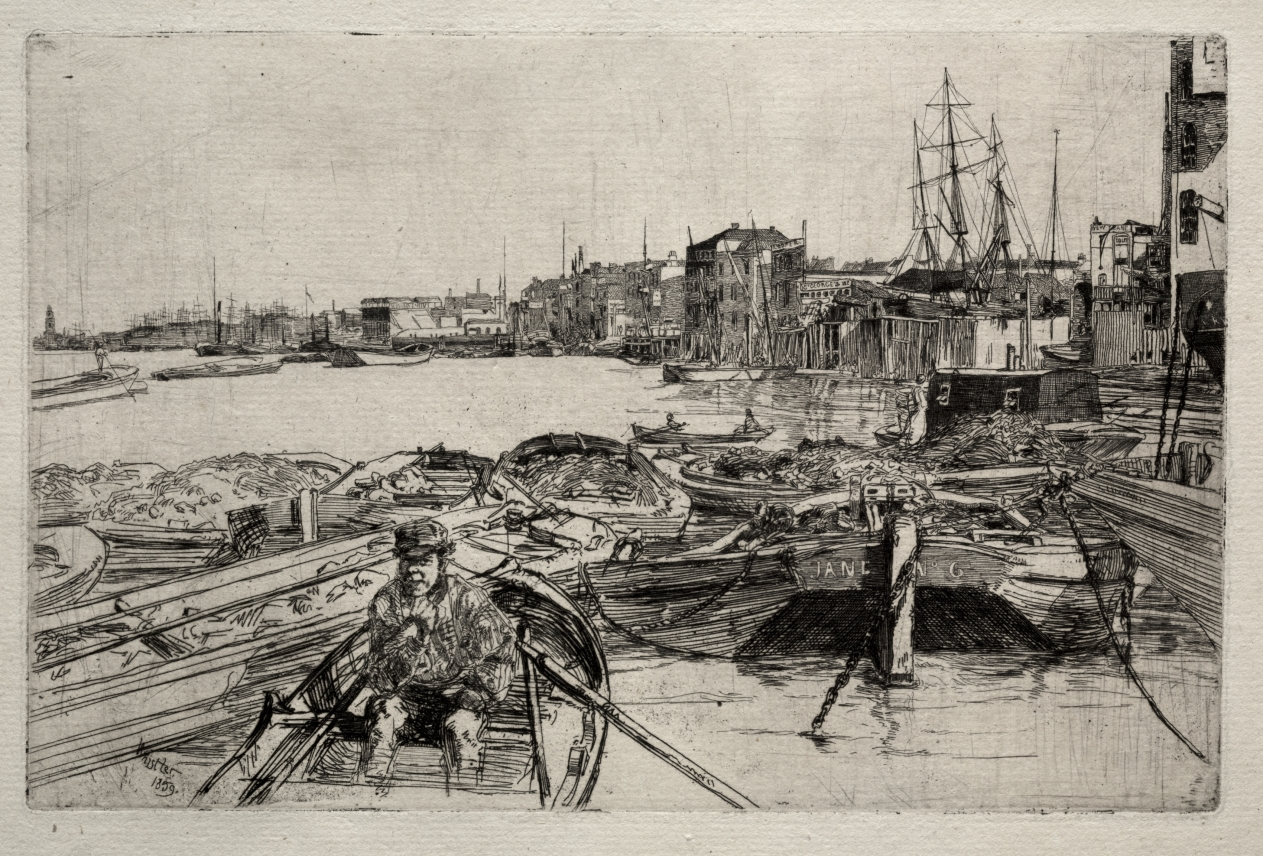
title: The Pool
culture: America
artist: James McNeill Whistler (American, 1834–1903)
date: 1859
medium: etching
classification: Print